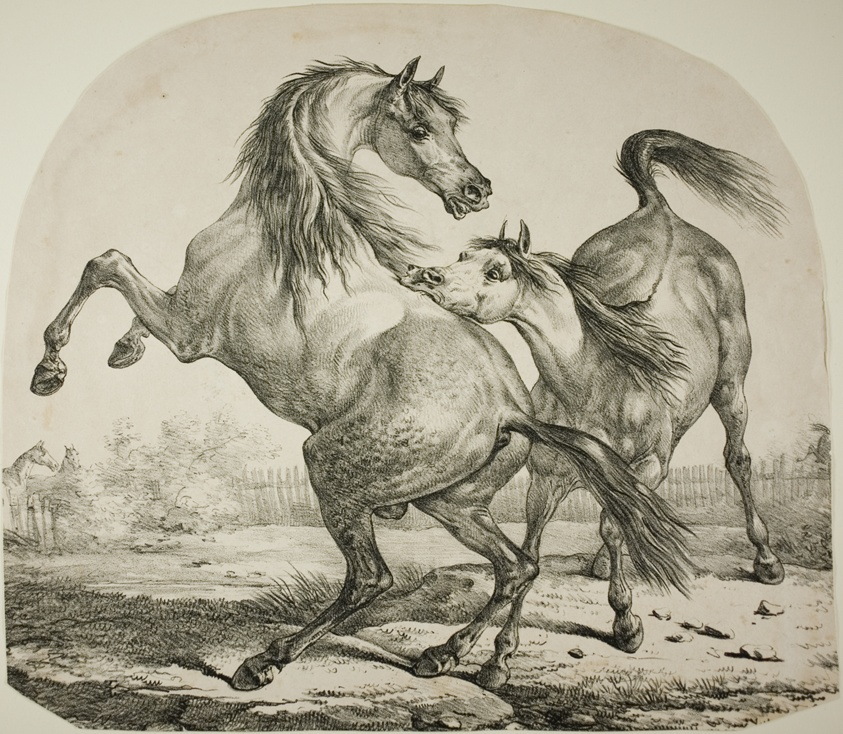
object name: Print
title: Wild Horses Fighting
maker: Carle Vernet (French, 1758-1836); published by Francois Seraphin Delpech (French, 1778-1825)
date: c. 1820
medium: Lithograph in black on buff wove paper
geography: France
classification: lithograph; print; prints and drawing